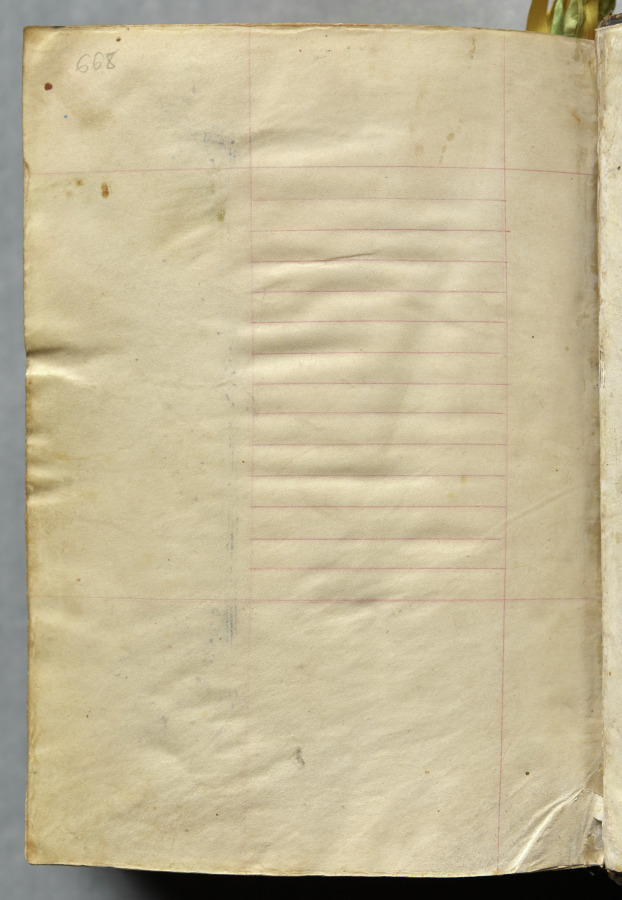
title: Hours of Charles the Noble, King of Navarre (1361-1425), fol. 328v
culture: France, Paris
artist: Master of the Brussels Initials and Associates (French)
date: c. 1405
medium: ink, tempera, and gold on vellum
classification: Bound Volume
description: This precious volume was obviously highly prized by its owner, the French-born King of Navarre, who had his coat of arms painted on no less than twenty folios. Rather than directly commissioning this manuscript from a specific workshop, it seems that Charles the Noble acquired his book of hours -- perhaps ready-made for the luxury market -- while on a trip to Paris in 1404-05. A collaborative effort, six painting styles are evidenced within the pages of this codex, those of two Italians, two Frenchmen, and two Netherlanders. The painter who was responsible for the planning and decoration of the book, and who produced seventeen of the large miniatures, was a Bolognese artist known as the Master of the Brussels Initials. His principal assistant, responsible for most of the borders, was a Florentine who signed his name "Zecho" da Firenze on folio 208 verso.